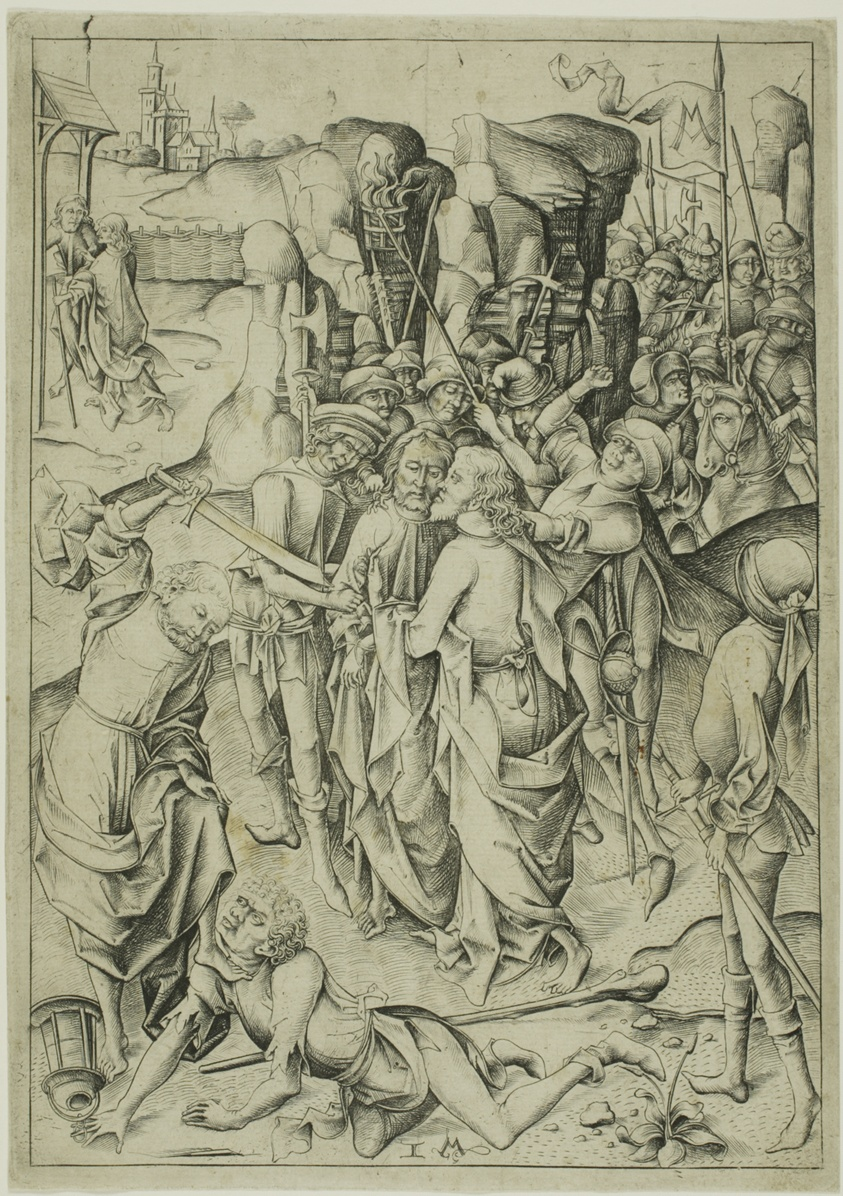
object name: Print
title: The Betrayal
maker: Israhel van Meckenem the Younger; German, c. 1440/45-1503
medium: Engraving on cream laid paper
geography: Germany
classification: engraving; print; prints and drawing